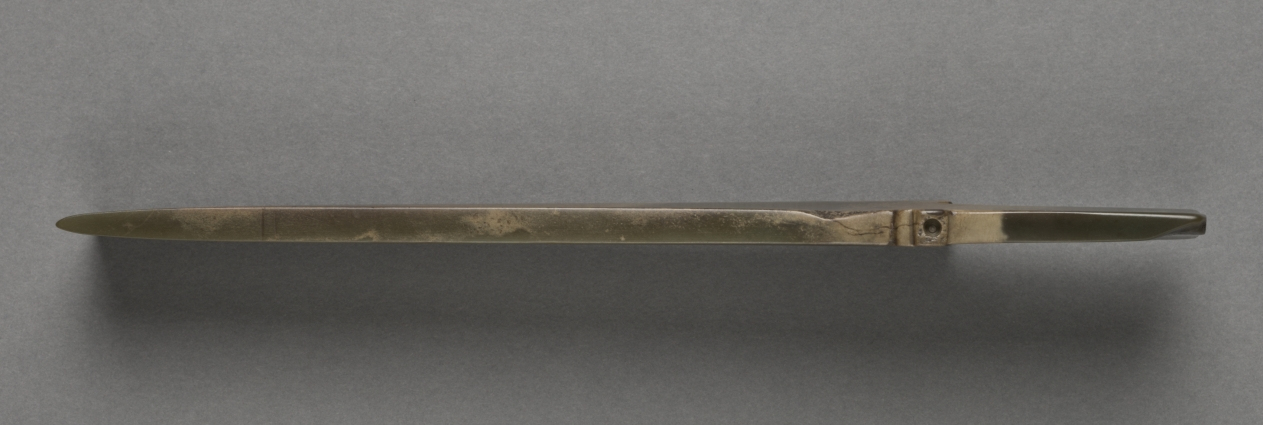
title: Ge (Dagger Axe)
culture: China, Neolithic period (3000s–2000s BCE) to Shang dynasty (c. 1766–1045 BCE)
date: c. 2500–1500 BCE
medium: nephrite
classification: Jade